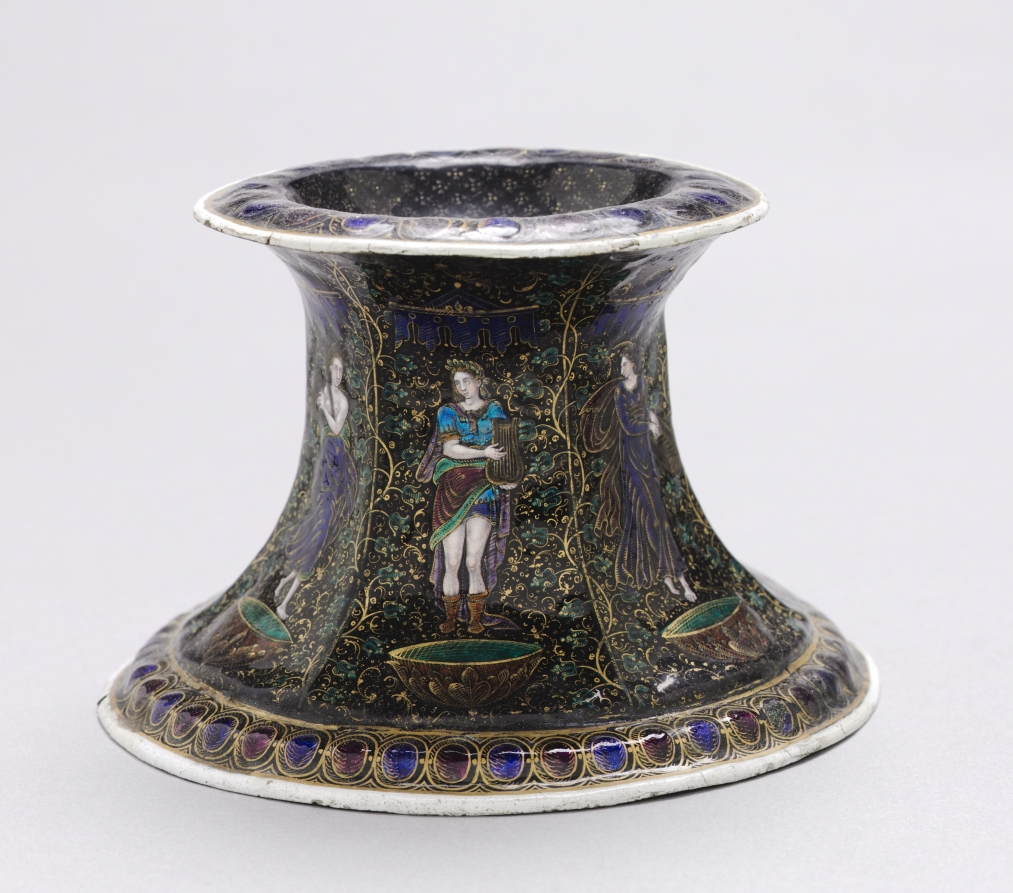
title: Salt Dish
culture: France, Limoges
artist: Jean Limousin (French, 1528–c. 1610)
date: early 1600s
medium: painted enamel on copper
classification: Ceramic